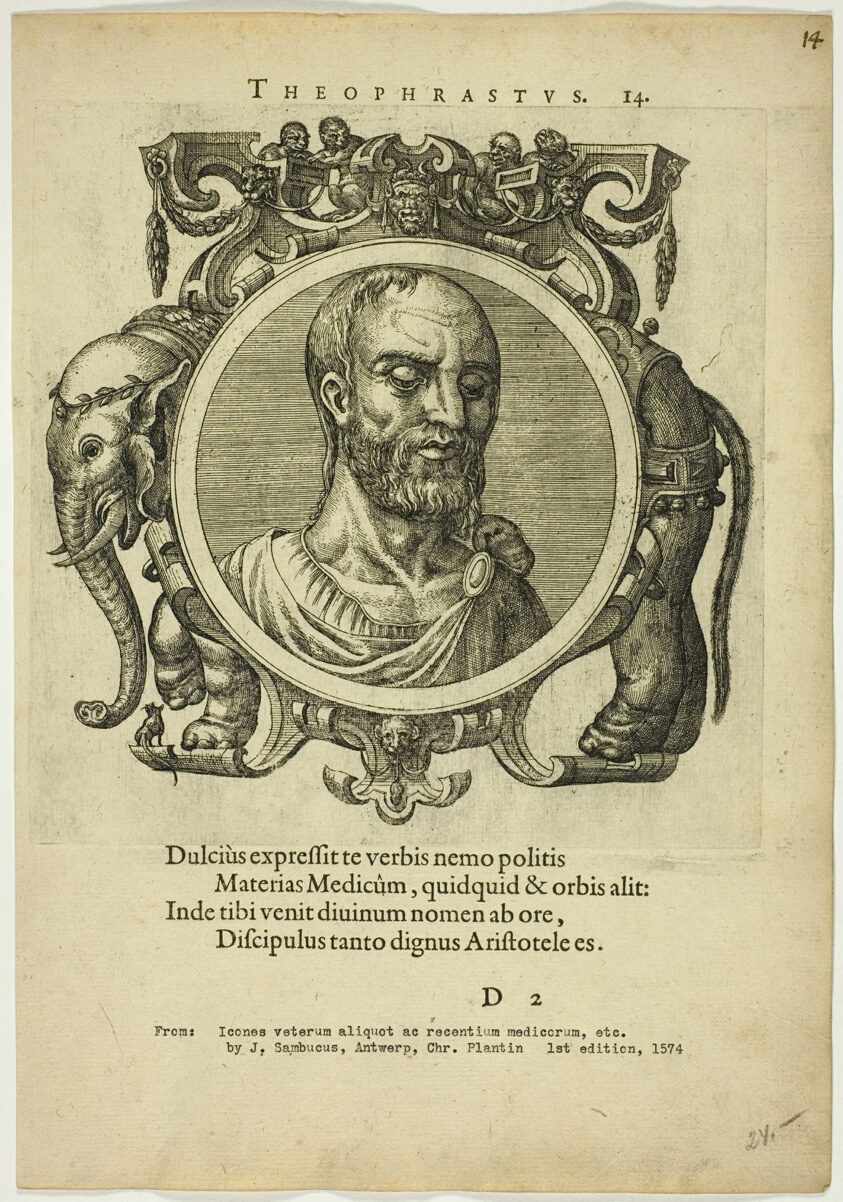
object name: Print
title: Portrait of Theophrastus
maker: Unknown Artist (Flemish); written by Johannes Sambucus (Flemish, 1531-1584)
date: published 1574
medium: Etching, with engraving, on cream laid paper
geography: Flanders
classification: etching; print; prints and drawing